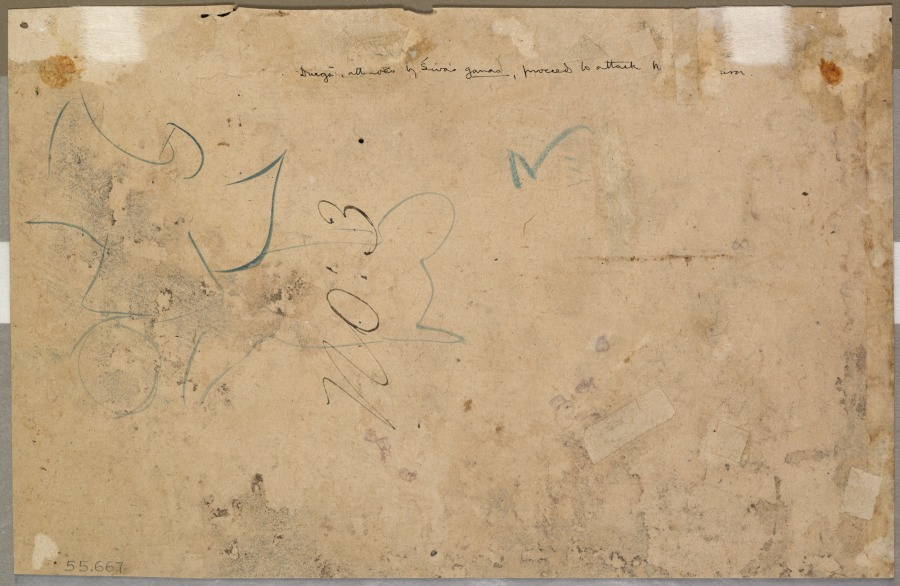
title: Durga Slaying Mahisha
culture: Northern India, Pahari kingdoms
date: c. 1830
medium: Gum tempera and gold on paper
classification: Painting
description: According to the text dedicated to the exploits of the great goddess Devi in her various forms, there was a time in the mythic past when a buffalo demon was ravaging the world. Storm clouds swirl above and dust below him. The goddess in her warrior aspect in which she is named Durga rides a chariot pulled by two leonine tigers with blue skies and flowering trees above her. The two are about to clash in a bloody battle that will take place on the gently sloping hillside evocative of the western Himalayan foothills where this painting was made.